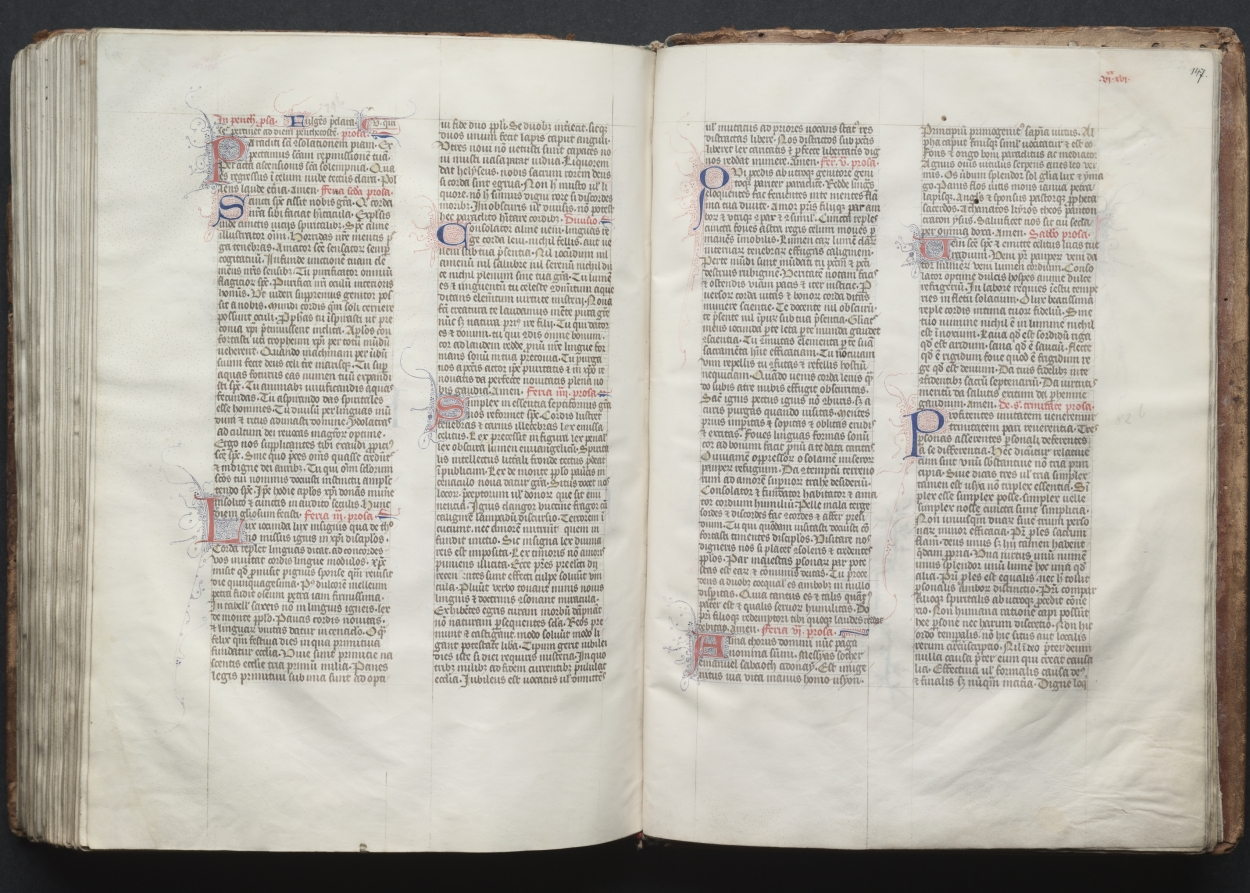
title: The Gotha Missal: Fol. 147r, Text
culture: France, Paris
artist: Master of the Boqueteaux (French)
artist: and Workshop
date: c. 1375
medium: ink, tempera, and gold on vellum; blind-tooled leather binding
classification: Bound Volume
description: The style and quality of this manuscript's decoration is typical of deluxe Parisian books made for aristocratic or royal patrons. Most of the book's decoration appears to be the work of the Master of the Boqueteaux, an artist active at the court of King Charles V (died 1380). His style was apparently shared by a number of book illuminators working in and around Paris. It is very possible that the Gotha Missal belonged to Charles V, but is not provable because the manuscript has no royal portraits and lacks a colophon. Given the book's magnificent decoration, however, it would seem that it was produced for a Valois prince, if not for the king himself. The manuscript receives its name from the German dukes of Gotha, its later owners.